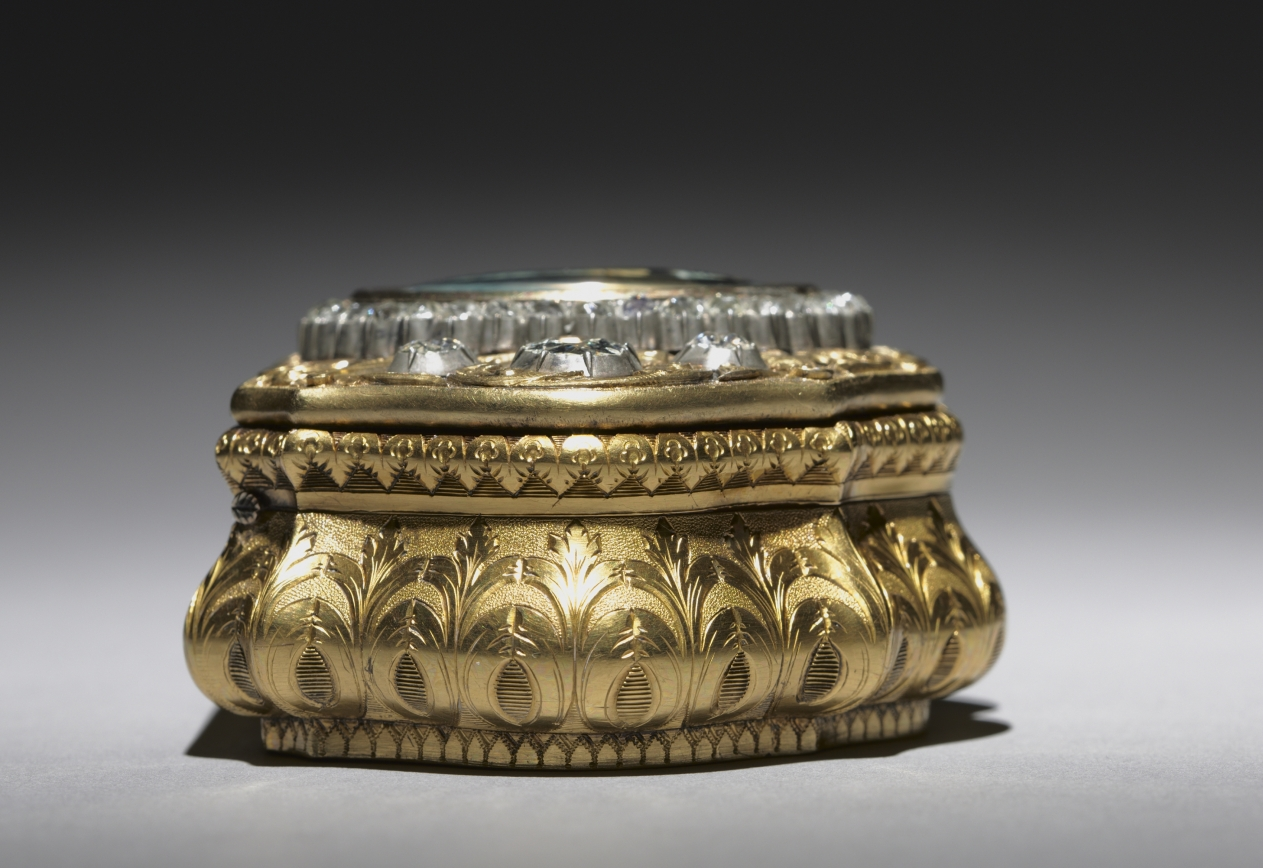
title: Box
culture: Switzerland, Neufchatel, 19th century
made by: Goffert (Russian)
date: c. 1850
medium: gold set with diamonds around a miniature of Tsar Alexander III (1845-1894)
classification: Miscellaneous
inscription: miniature signed in Russian: " " (Goffert).